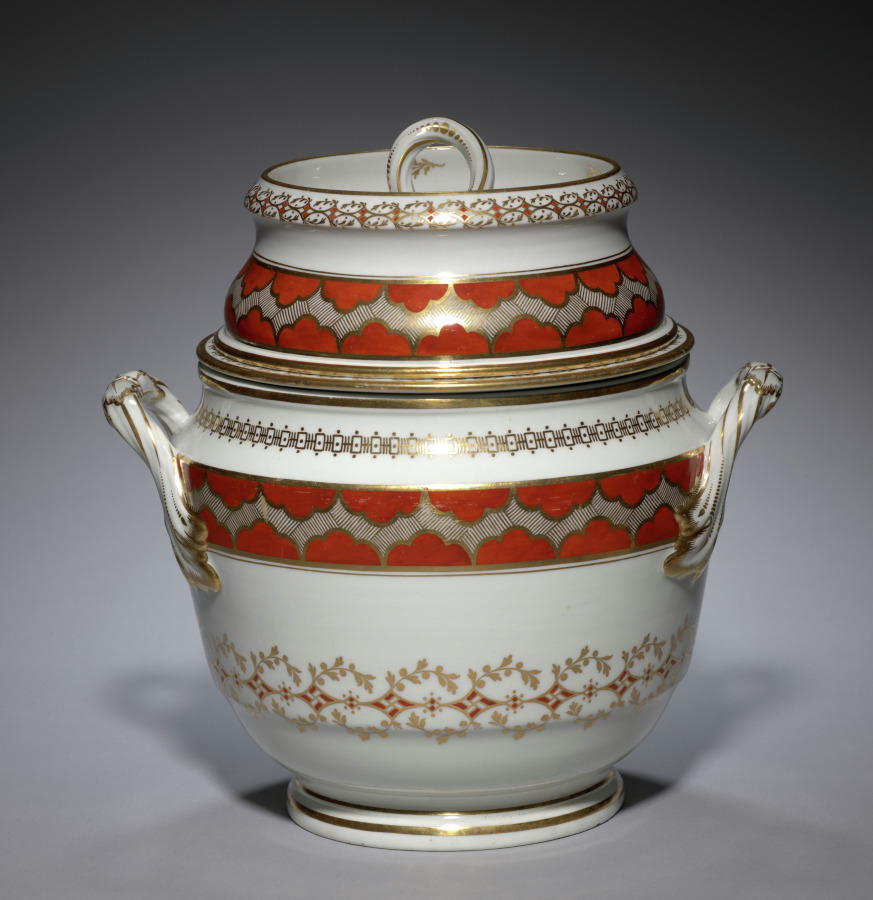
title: Ice Pail (1 of 2)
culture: England, late 18th-early 19th Century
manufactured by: Flight & Barr (British)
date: 1793–1807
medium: porcelain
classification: Ceramic